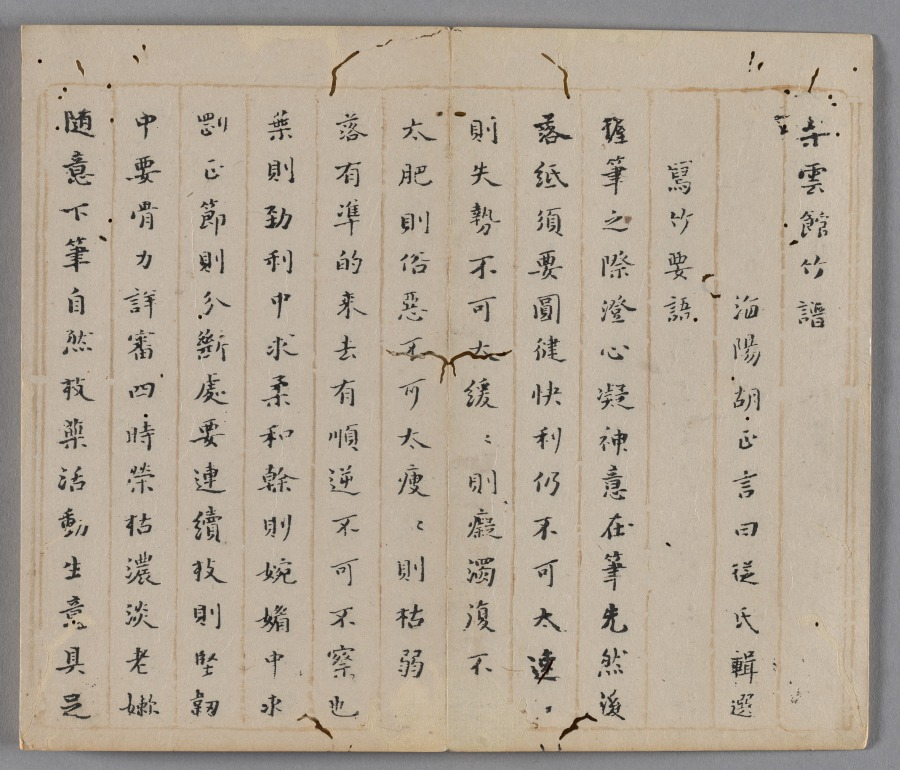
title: Ten Bamboo Studio Painting and Calligraphy Handbook (Shizhuzhai shuhua pu): Bamboo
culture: China, Qing dynasty (1644-1911)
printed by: Hu Zhengyan (Chinese, c. 1584–1674)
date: 1633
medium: Woodblock-printed book; ink and colors on paper; first edition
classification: Print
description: Color printing reached a level of perfection in the early 1600s, as seen in this Ten Bamboo Studio Collection of Calligraphy and Painting and the Mustard Seed Garden Manual of Painting (printed 1679 and 1701). The painterly quality, precision in registering (aligning) the woodblocks, and harmonious colors made them the most successful color print editions in Chinese history. Both editions were printed and compiled in Nanjing, spread nationwide, and had a great impact on the arts in Japan and Korea.